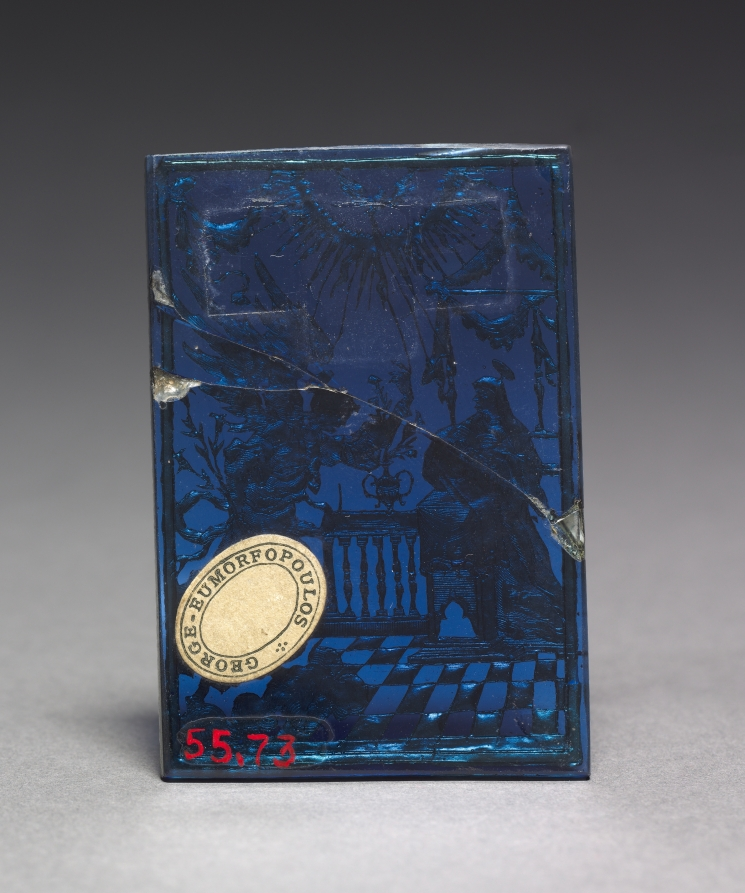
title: The Annunciation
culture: Germany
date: c. 1625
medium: enamel on glass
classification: Glass